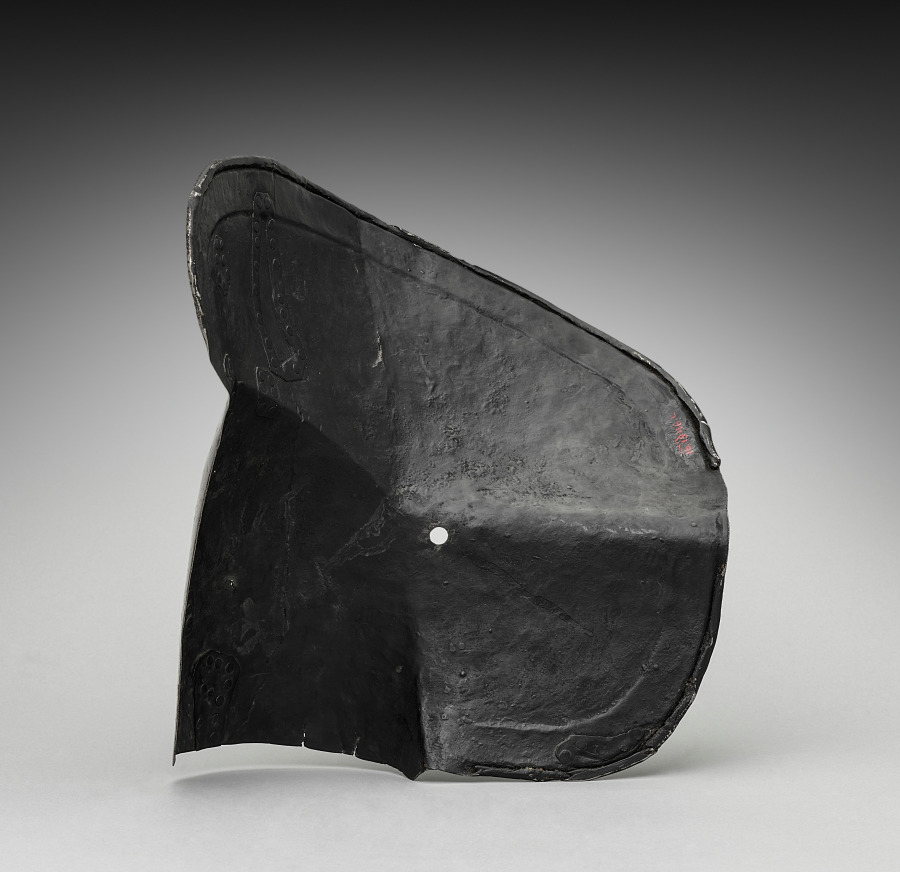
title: Gardbrace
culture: Germany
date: c.1550–1570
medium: iron, steel, leather and brass rivets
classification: Arms and Armor